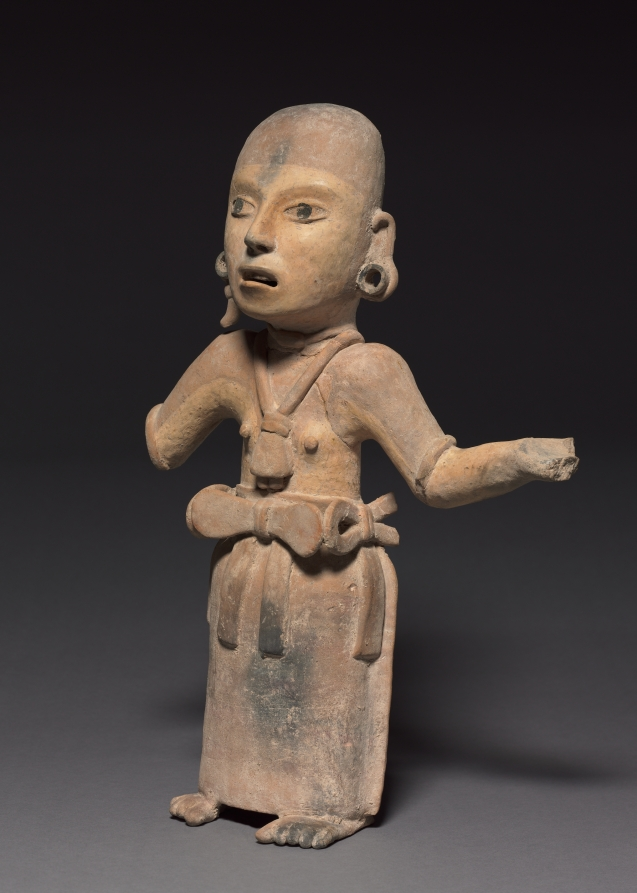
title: Female Figure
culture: Mexico, Southern Veracruz, Limon, Remojades Monumental Sculpture type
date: 200–500 CE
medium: pottery with burnished buff slip and asphalt paint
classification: Sculpture